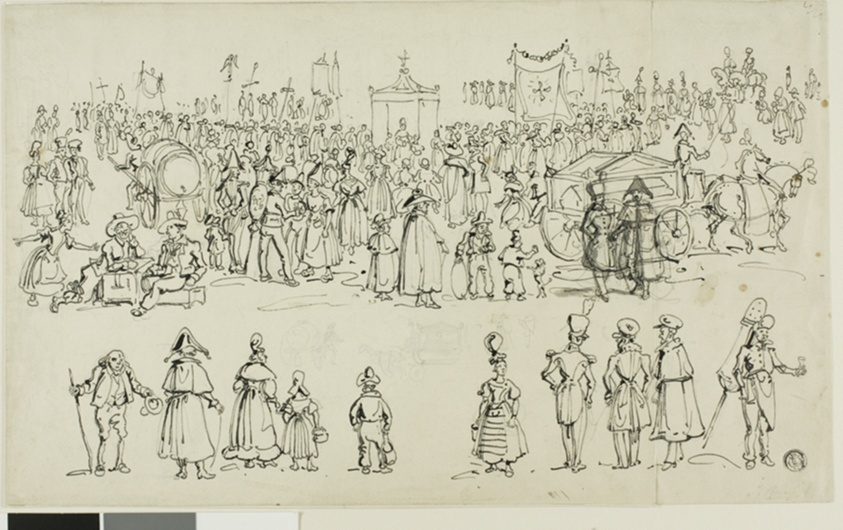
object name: Drawing and Watercolor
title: Religious Festival in Northern France, possibly Normandy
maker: John Coney (English, 1786-1833)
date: c. 1820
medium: Pen and black ink with brush and gray wash, over graphite, on ivory wove paper, partially laid down on ivory laid paper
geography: England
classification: pen and ink drawings; drawings (visual works); prints and drawing